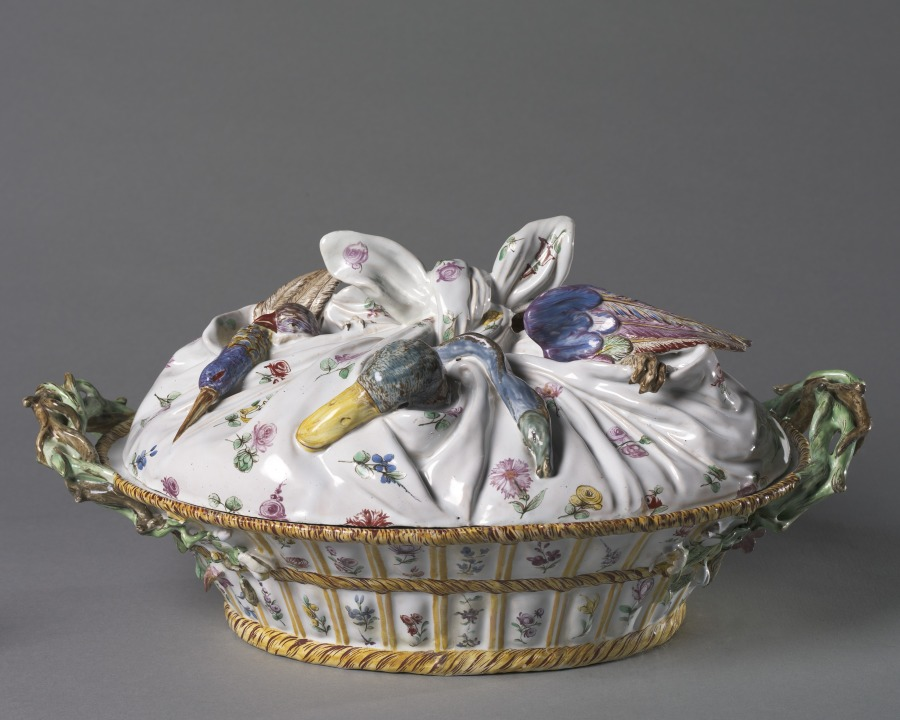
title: Covered Tureen in the Form of a Basket of Game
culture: France, 18th century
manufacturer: Sceaux Factory (French, active 1748–66)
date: c. 1755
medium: Tin- glazed earthenware (faience) wth enamel decoration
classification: Ceramic